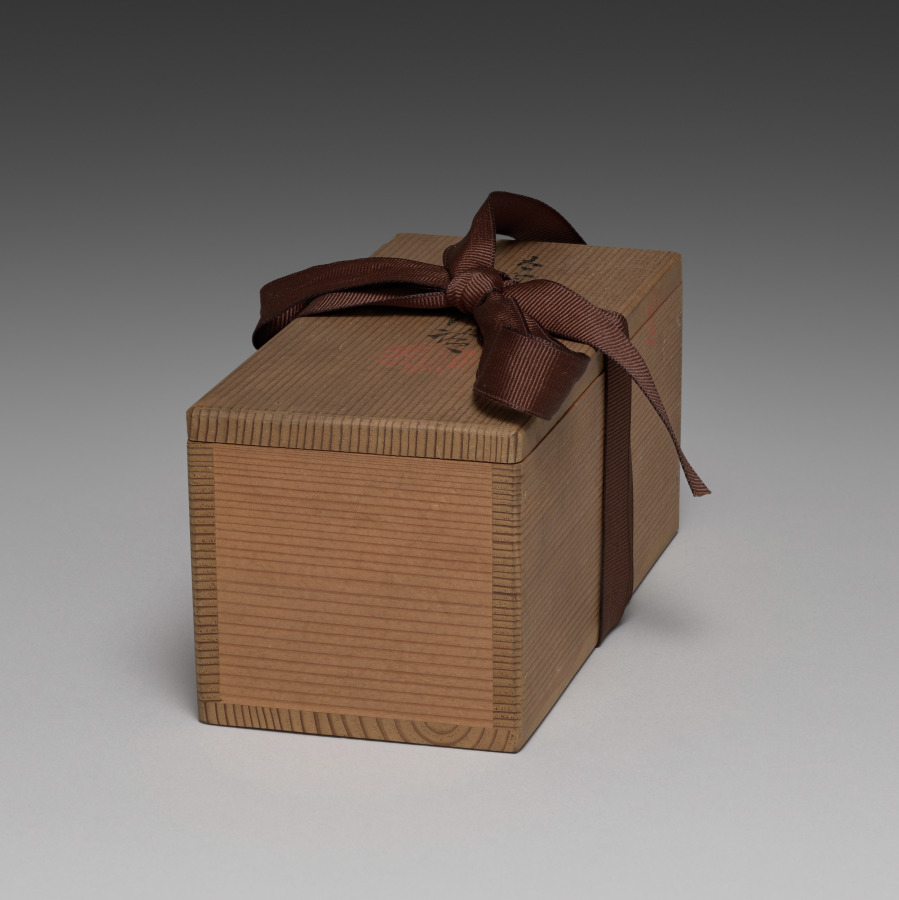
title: Water Cooler with Chinese Gardens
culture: Japan, Meiji period (1868–1912)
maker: Seifū Yohei III (Japanese, 1851–1914)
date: 1893–97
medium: Porcelain with molded and carved designs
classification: Ceramic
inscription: Artist's seal beneath the handle.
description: Unlike most pieces by the Seifu Yohei studio, this one bears a seal beneath the handle rather than on the base. The glaze and technique are identified on the box as taihakuji, or “great white porcelain,” an important early invention Yohei III devised in 1872 that involved the combination of a distinctive translucent, creamy glaze over an ivory-colored clay body. The body’s two sides have garden scenes seen through windows. Designs of flowers and butterflies are incised in the spaces at both ends. The garden on the right-hand side of the vessel, seen through a round window, has a decorative rock with grasses beneath a cloudy sky; and on a tiled veranda, there is a teapot as well as a fan and two scrolls inserted into a double-handled urn or kettle atop a brazier. The garden on the left-hand side has two enormous flowers below what may be either a cloud or a rippling pond; a garden rock—or perhaps a carved wood sculpture—with a circular perforation sits on what appears to be a veranda. While the details may be open to interpretation, the setting is a rather glamorous Chinese residence or palace with a superbly tended garden in spring or summer.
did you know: This water cooler has a handle with a dragon head.